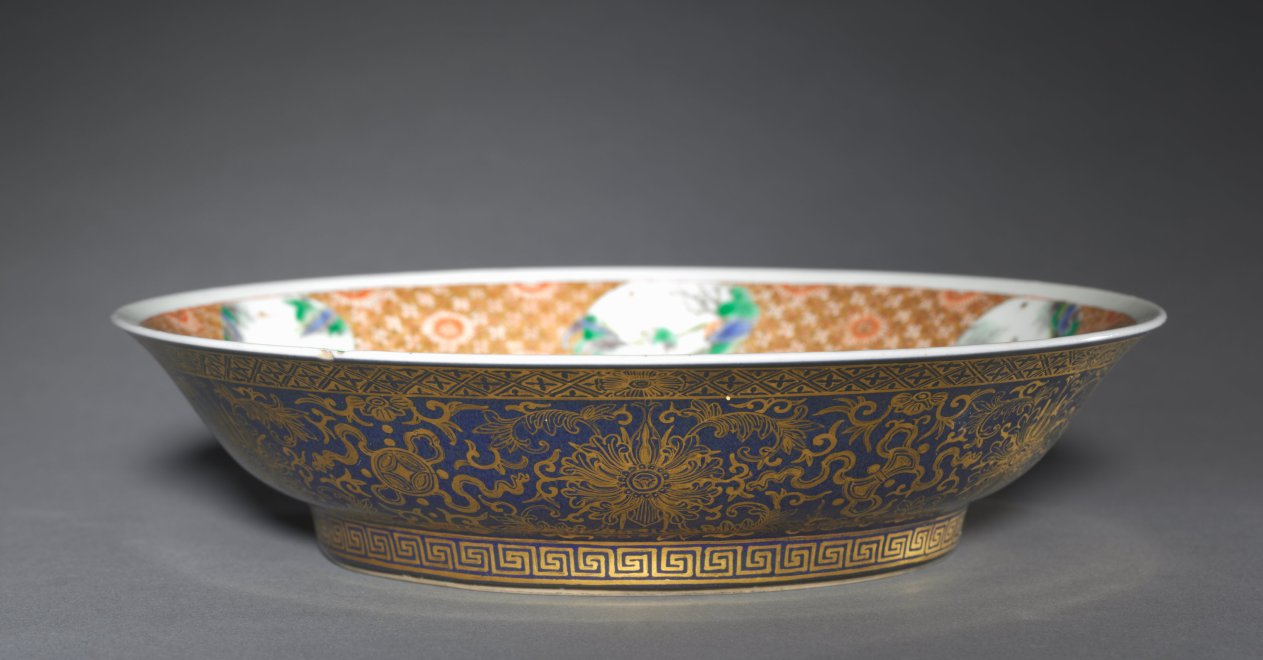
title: Dish with Zhang Guolao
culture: China, Jiangxi province, Jingdezhen kilns, Qing dynasty (1644-1911), Kangxi reign (1662-1722)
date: 1662–1722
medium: porcelain with famille verte overglaze enamel and painted gold decoration (interior) and powder blue glaze with painted decoration (exterior)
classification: Ceramic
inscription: 大清康熙年製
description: Zhang Guolao, featured on this dish, is one of the Eight Immortals and a gifted magician who was believed to know the secret arts to obtain longevity. Typically depicted as an old man and accompanied by his mule, he is the patron saint of artists. His mule is said to be magical; it can be folded up like a piece of paper to fit into a small bag. The central scene is framed by a sumptuously gold-decorated rim showing spaces reserved for landscape scenes in primarily fresh blue and green colors.